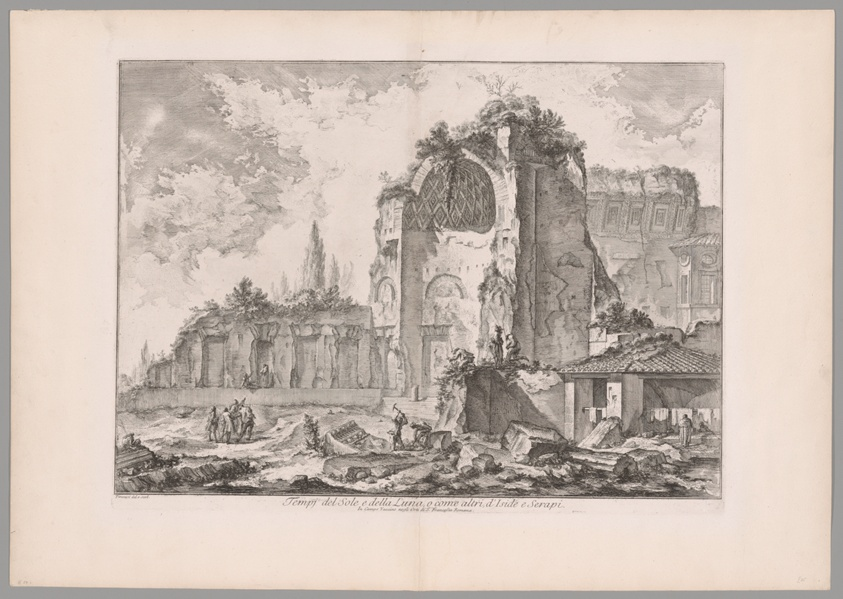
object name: Print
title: Temple of Sol and Luna…, from Views of Rome (Tempi del Sole e della Luna, o come altri, d'Iside e Serapi, from Vedute di Roma)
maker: Giovanni Battista Piranesi (Italian, 1720–1778)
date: 1760-78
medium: Etching in black on ivory laid paper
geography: Italy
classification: print; etching; paper; prints and drawing